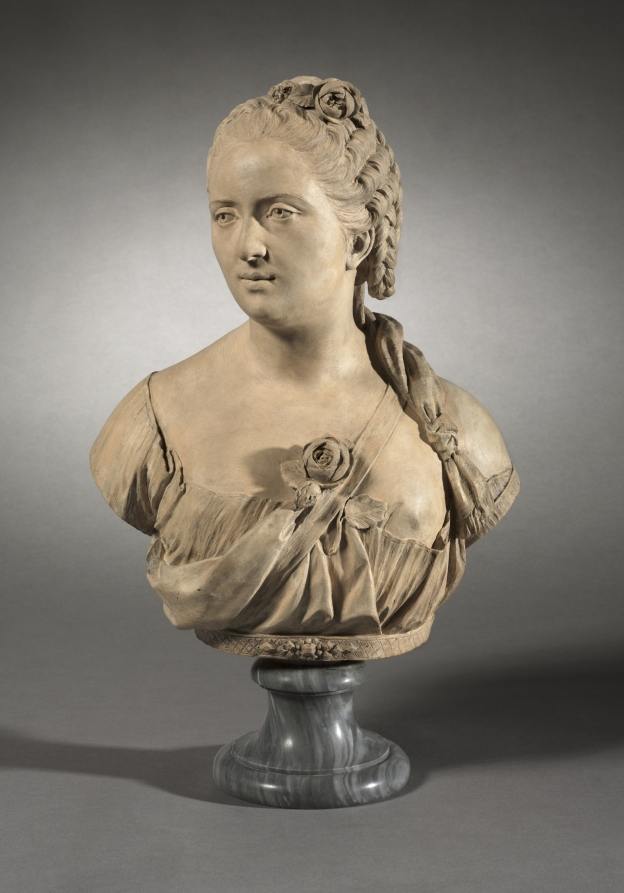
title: Portrait of a Woman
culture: France, 18th century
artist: Jean-Baptiste Defernex (French, c. 1729–1783)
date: 1759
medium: terracotta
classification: Sculpture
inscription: Signed on cut of left proper arm: "p[ar?] j. B, F, Defernex 1759"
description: The precise rendering of the costume and the unique facial features of the woman indicate this work is a true portrait, although the sitter has yet to be identified.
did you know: Art historians describe Defernex's portrait busts as "honest, unidealized, [and] quite free from gallant flattery."